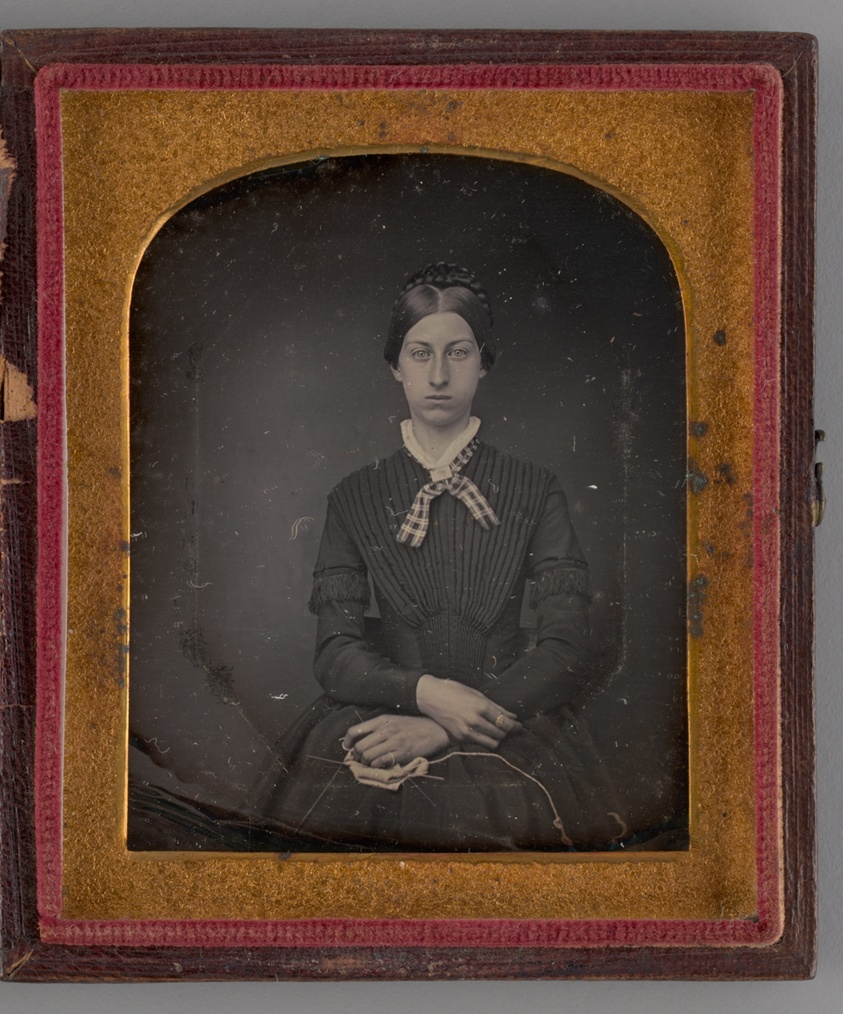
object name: Photograph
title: Untitled (Portrait of a Seated Woman)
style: 19th century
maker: Unknown maker; American, 19th century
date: 1847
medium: Daguerreotype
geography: United States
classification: portrait; daguerreotype; portrait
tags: lundberg collection, portraits: female subject, female, photography, portrait, portraits